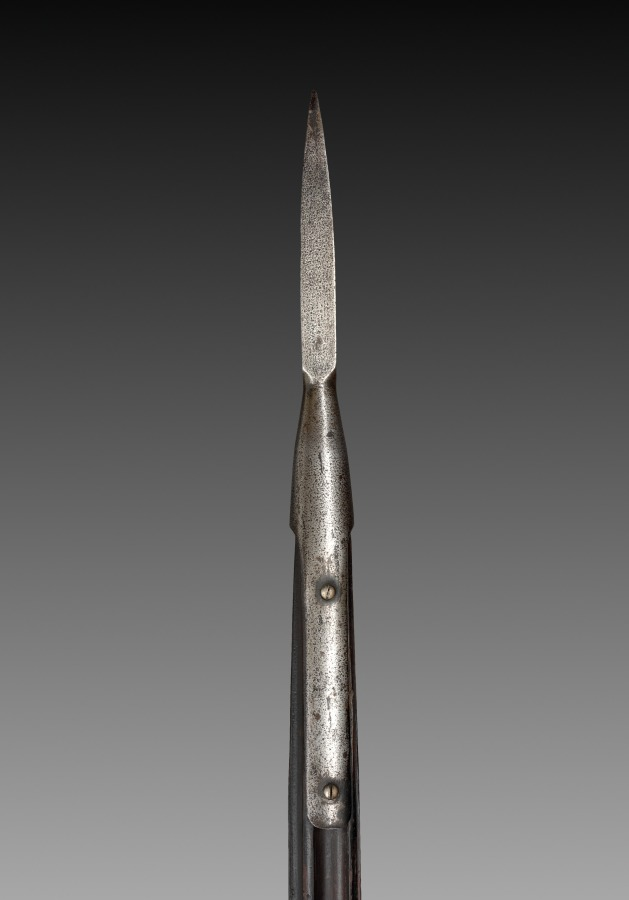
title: Tourney Lance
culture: unassigned (European), probably late 19th century (in 16th century style)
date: probably late 1800s (in 16th century style)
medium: wood, five concave sections, painted red and white; steel point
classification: Arms and Armor